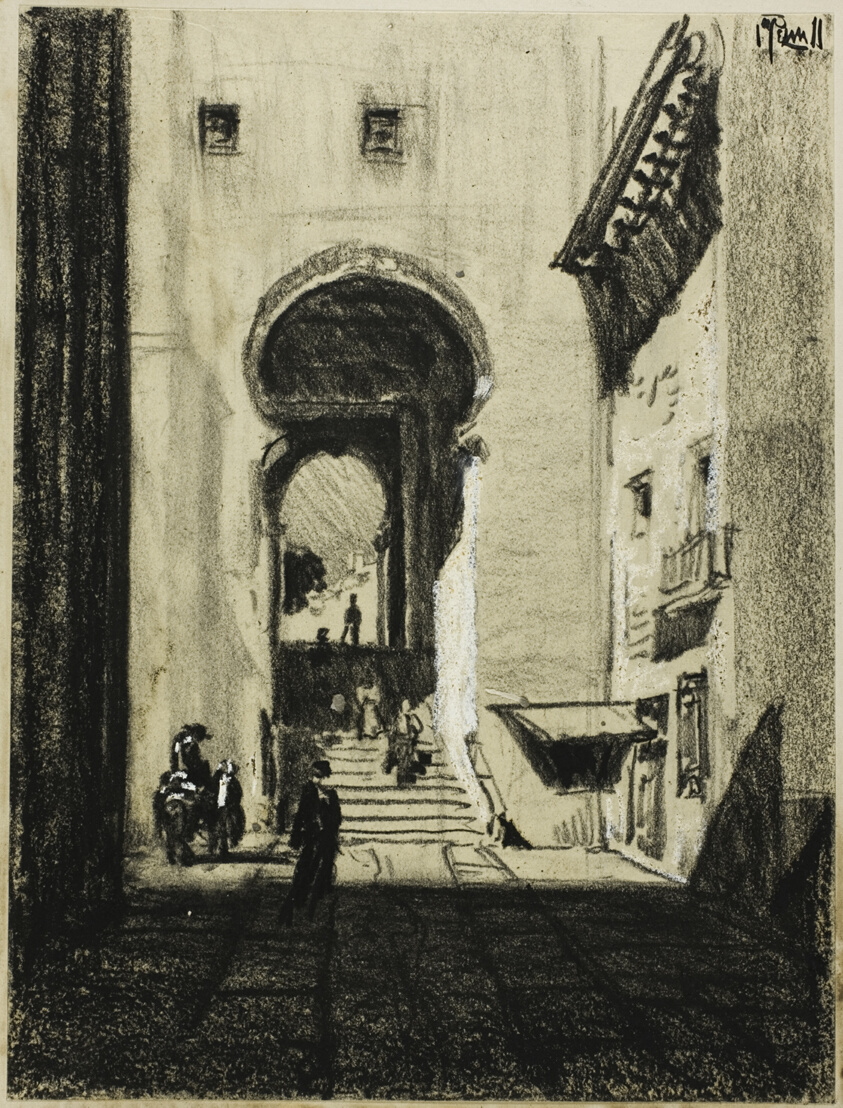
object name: Drawing and Watercolor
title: Entrance to Zocodover, Toledo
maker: Joseph Pennell (American, 1857-1926)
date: c. 1903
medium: Oiled charcoal and stumping, heightened with white chalk, on cream wove paper, perimeter mounted on off-white wood pulp laminate board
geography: United States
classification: charcoal; drawings (visual works); prints and drawing